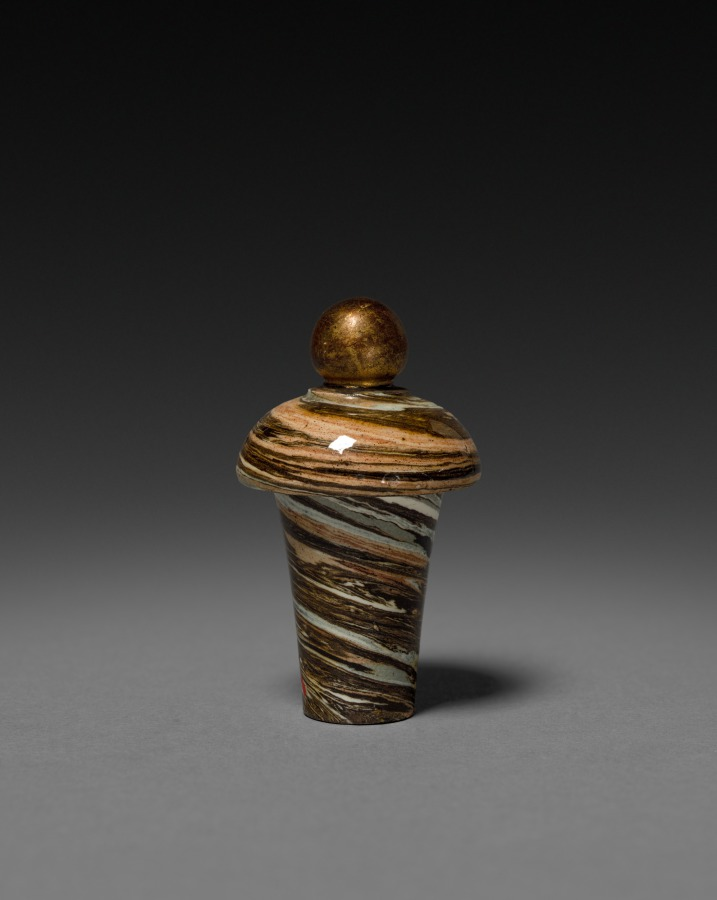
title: Urn (lid)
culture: England, late 18th or 19th century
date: late 1700s - 1800s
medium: earthenware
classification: Ceramic